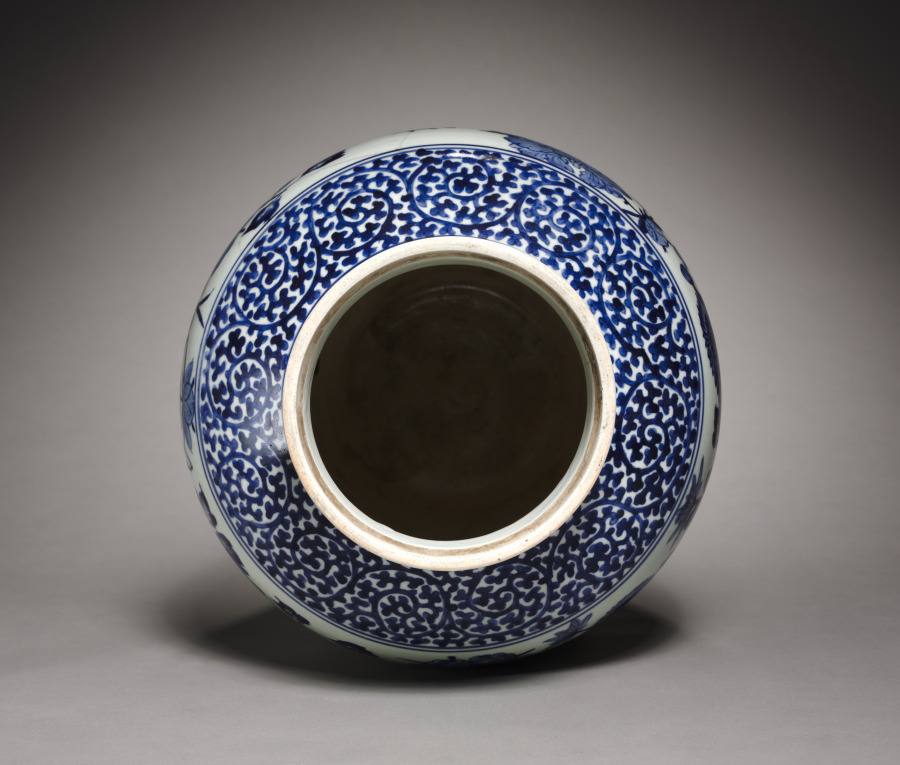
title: Large Jar with Peonies, Orchids, and Chrysanthemums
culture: Japan, Edo period (1615–1868)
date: late 1600s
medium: Porcelain with underglaze blue decoration (Imari ware)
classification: Ceramic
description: Spring peonies, summer orchids, and autumn chrysanthemums bloom at the same time amid garden rocks. These underglaze blue motifs were inspired by similar designs on Chinese ceramics made for export to Europe. In the early 1600s, Korean potters in Japan discovered kaolin, the clay essential for porcelain production. At the same time, political turmoil in China following the collapse of the Ming dynasty (1368–1644) disrupted Chinese exports. Together, these circumstances created an opportunity for Japan to supply ceramics to the European market. Careful study of Chinese prototypes shaped the work of Japanese ceramists for both domestic and overseas audiences.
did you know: This design shows the changing of the seasons: one side depicts a peony blossom in the spring, and the other side continues with chrysanthemums and an orchid in the autumn.